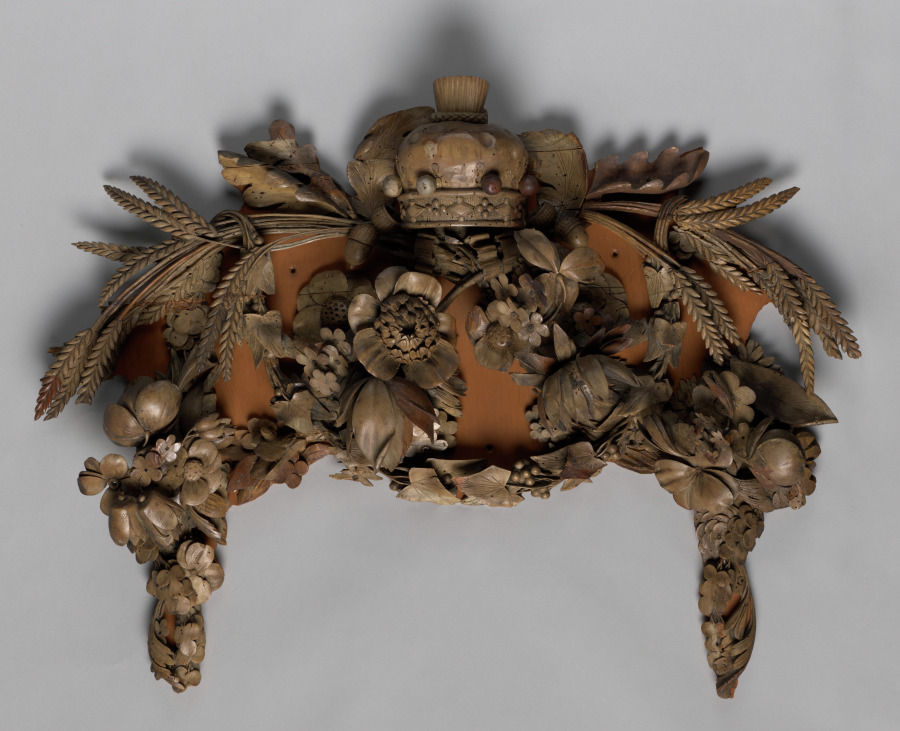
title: Overdoor Decoration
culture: England, 17th century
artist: Grinling Gibbons (British, 1648–1721)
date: c. 1675–1677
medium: limewood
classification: Sculpture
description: This wood carving by Grinling Gibbons, England’s most famous master of this medium, comes from the decoration above a door of the Inner Library at Cassiobury Park, near London, one of the artist’s earliest commissions. Decorative elements from this house were sold after it was pulled down in 1922, but many rooms were photographed before their destruction, and the original location of surviving carvings can thus be identified.